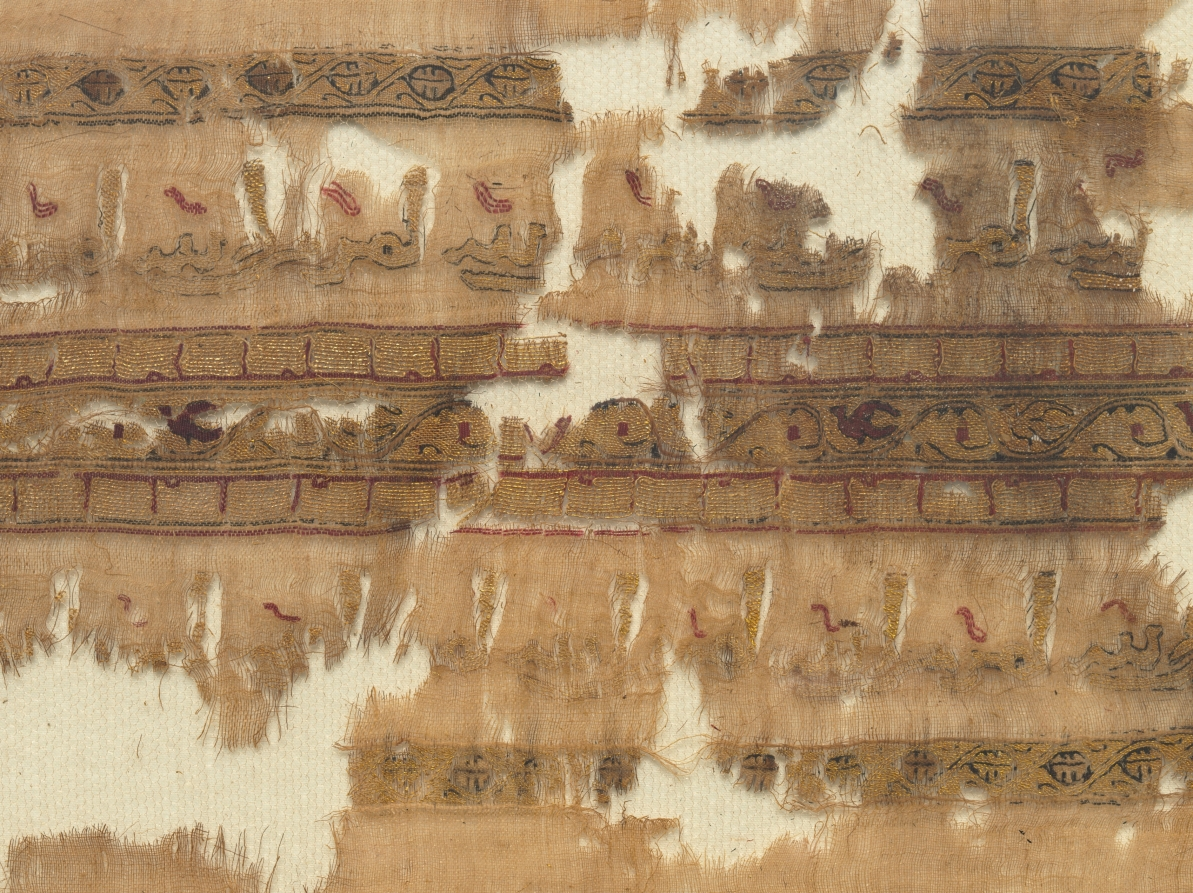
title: Tiraz with gold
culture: Egypt, Fatimid period, reign of Caliph al-Musta‘lī, 1094–1101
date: 1094 – 1101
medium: plain weave with inwoven tapestry weave: linen, silk, and gold filé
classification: Textile